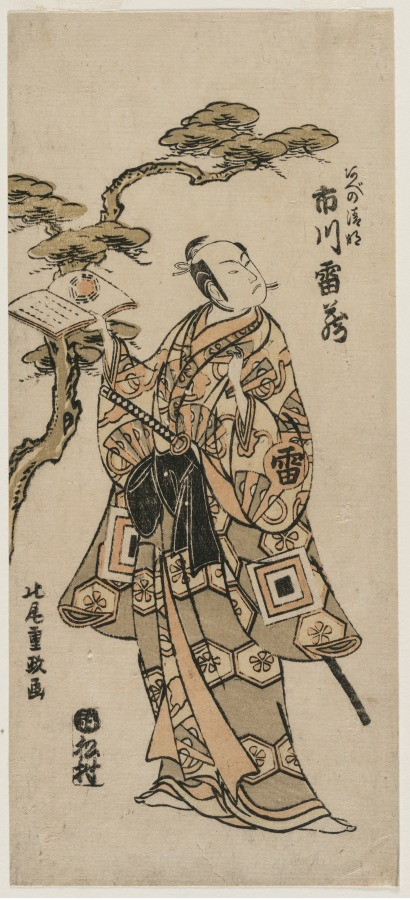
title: Ichikawa Raizo as Abe no Seimei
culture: Japan, Edo period (1615–1868)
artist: Kitao Shigemasa (Japanese, 1739–1819)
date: early 1760s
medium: color woodblock print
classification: Print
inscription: Signature: Kitao Shigemasa ga Publisher: Matsumura Yahei (Matsumura, emblem)